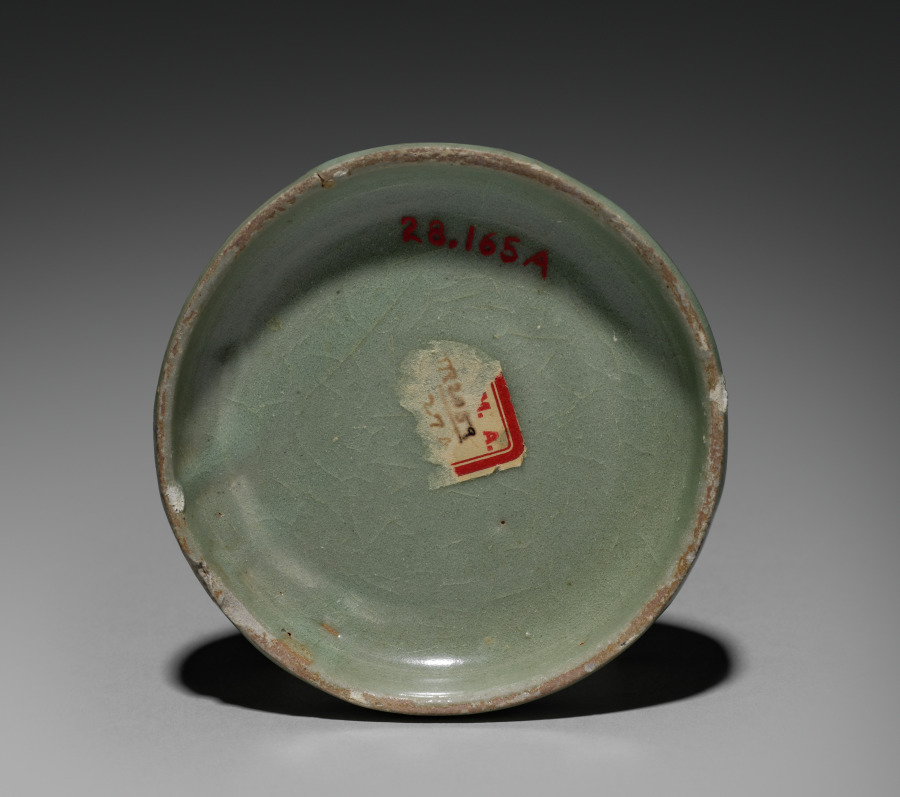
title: Pigment Box (lid)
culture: Korea, Goryeo dynasty (918–1392)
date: 918–1392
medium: inlaid celadon ware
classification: Ceramic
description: Celadons, spoons, seals, and bronze mirrors were the most common burial objects in tombs during the Goryeo period (918-1392). Once used to contain colored powder, rouge, and eyebrow gel for makeup, this small container was one of the standard goods that furnished elites' tombs. Both women and men used the grain powder of rice or millet for whitening their skin, safflower extract for rouge, and plant ash or soot for eyebrow gel. Yet, natural-looking make-up seems to have been the most favorable one in Korean according to the travelogue by Xu Jing (1091-1153), the Chinese diplomat who visited Korea in 1123.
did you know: This ceramic container was used to store either incense or cosmetics.